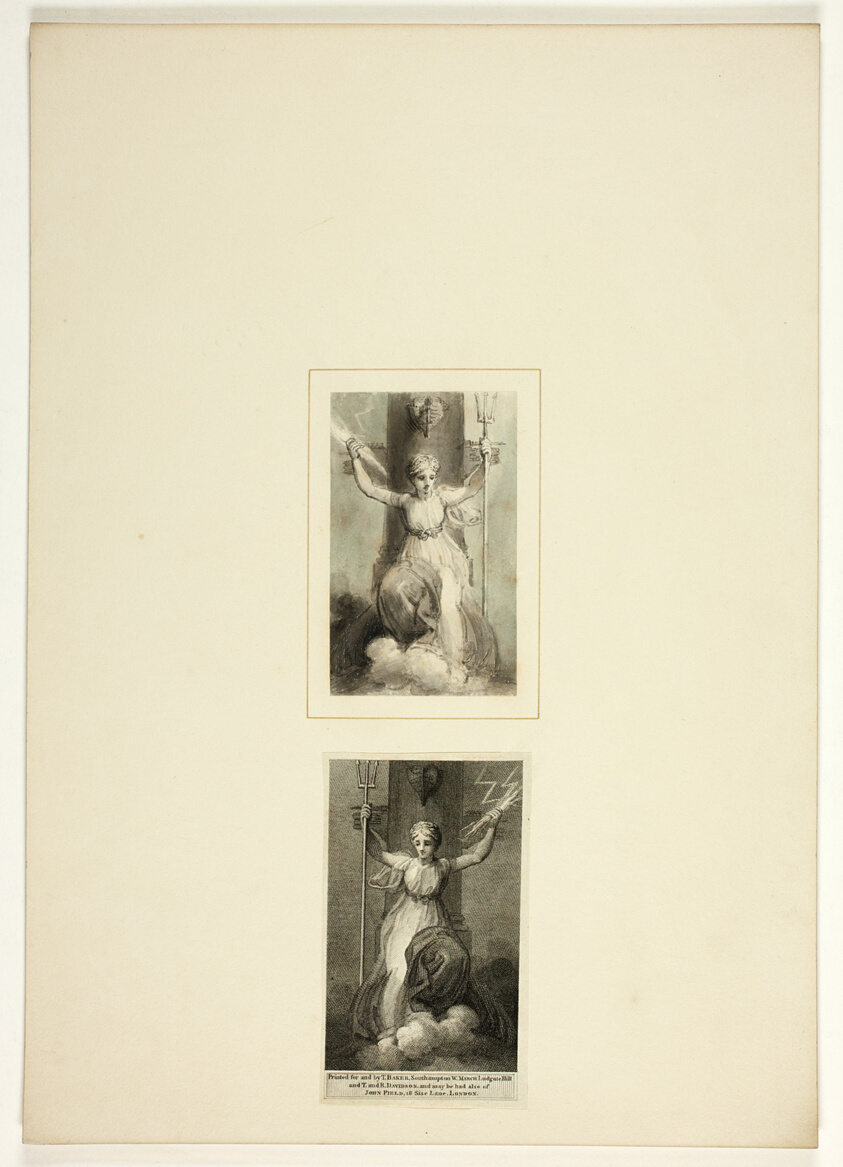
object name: Drawing and Watercolor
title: Study for a plate from Telemachus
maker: Thomas Stothard (English, 1755-1834)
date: c. 1797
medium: Ink wash on paper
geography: England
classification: ink or chalk wash; drawings (visual works); prints and drawing